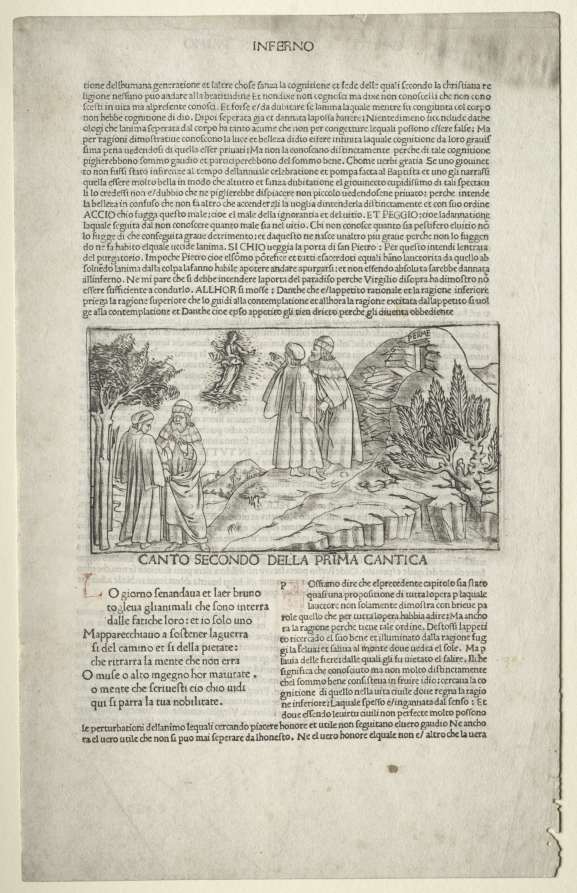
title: Dante and Virgil with the Vision of Beatrice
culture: Italy, 15th century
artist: attributed to Baccio Baldini (Italian, c. 1436–1487)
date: c. 1481–1485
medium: engraving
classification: Print